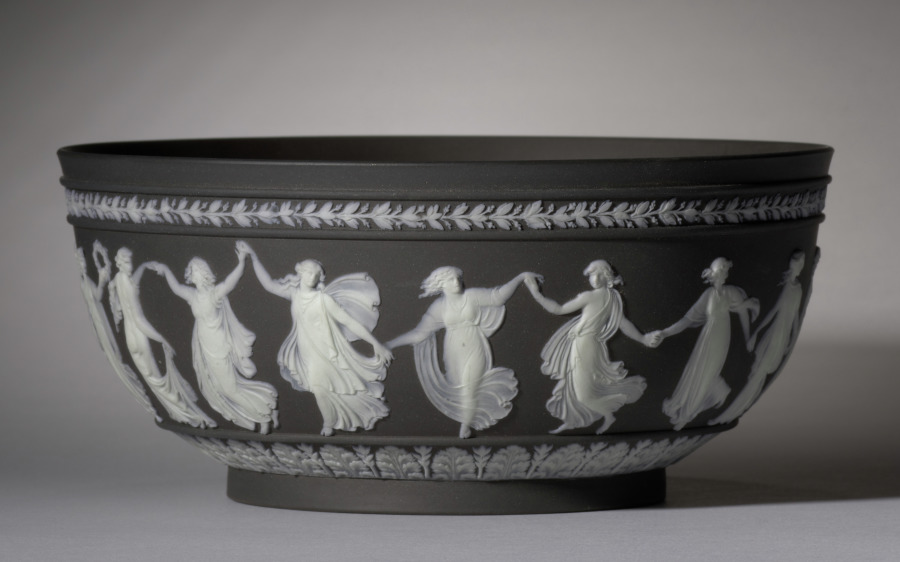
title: Bowl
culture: England, Staffordshire, 19th century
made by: Wedgwood Factory (British)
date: 1800–1850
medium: black basalt ware with applied decorations in white jasper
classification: Ceramic